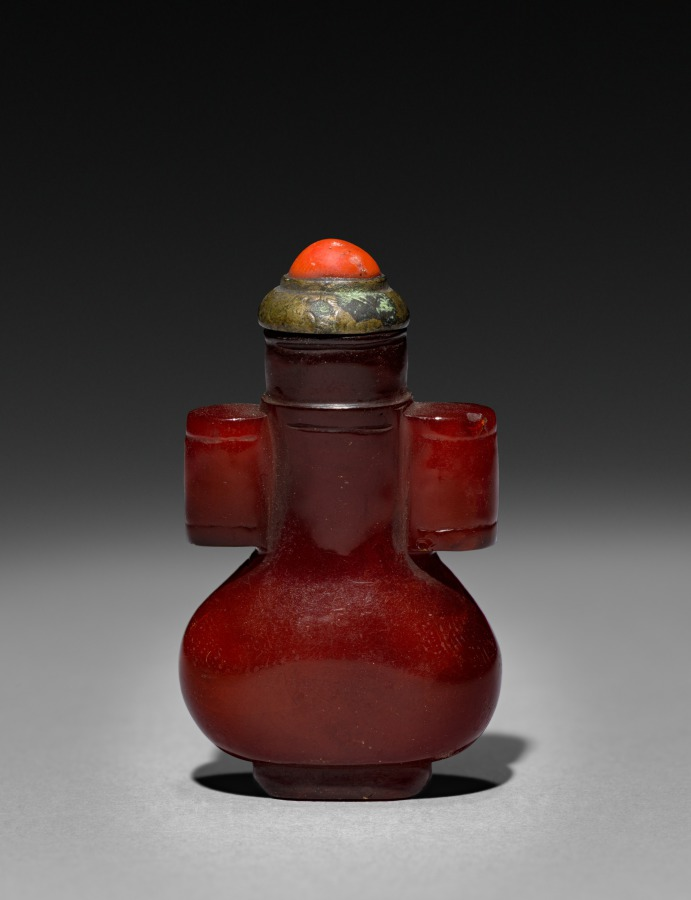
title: Snuff Bottle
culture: China, Qing dynasty (1644-1911)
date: 1644–1911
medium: glass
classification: Glass